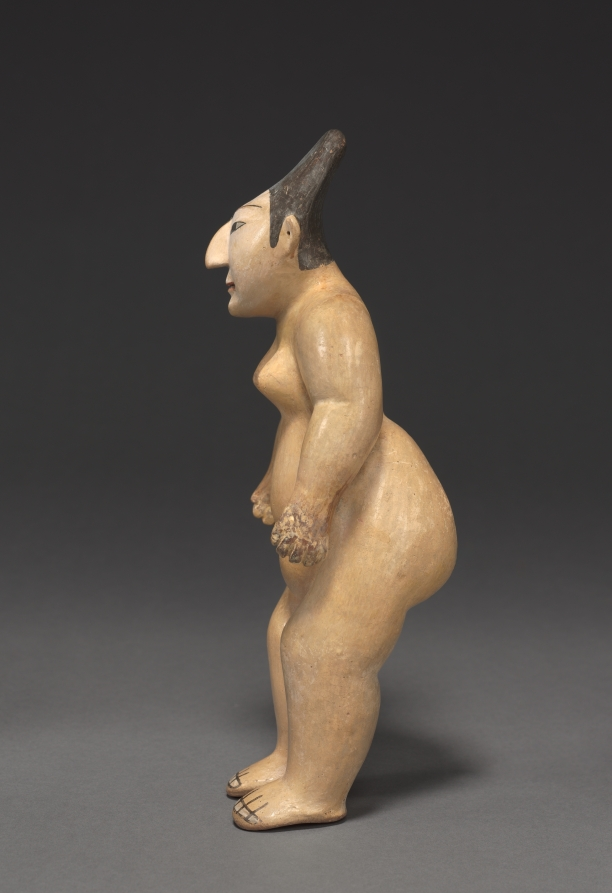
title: Female Figure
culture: Peru, South Coast, Nasca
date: 100 BCE–700 CE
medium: earthenware with colored slips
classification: Sculpture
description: This figure, which may once have worn small garments, might be a tomb offering. Her tapered head reflects the practice of cranial shaping, which may identify her social group and serve as a mark of beauty. Her fleshy hips likely refer to human and plant fertility, since food is the source of such bodily wealth. Her identity is unknown.